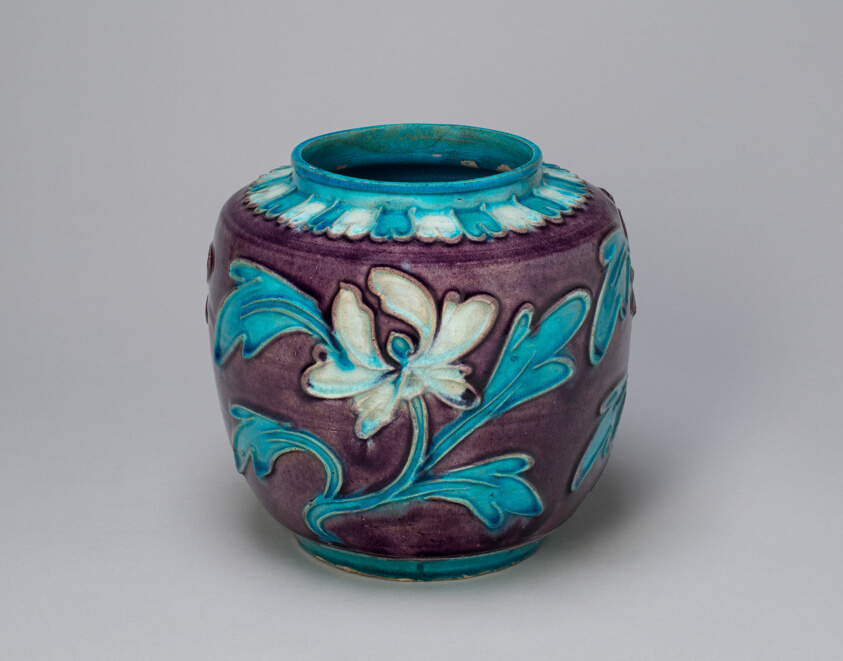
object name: Vessel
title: Jar with Peonies and lid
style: Chinese (culture or style)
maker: China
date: Ming dynasty (1368–1644), 16th century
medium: Fahua ware; stoneware with underglaze molded decoration and blue, purple, and white glazes, wood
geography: China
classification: porcelain; ceramics; asian art; vessel